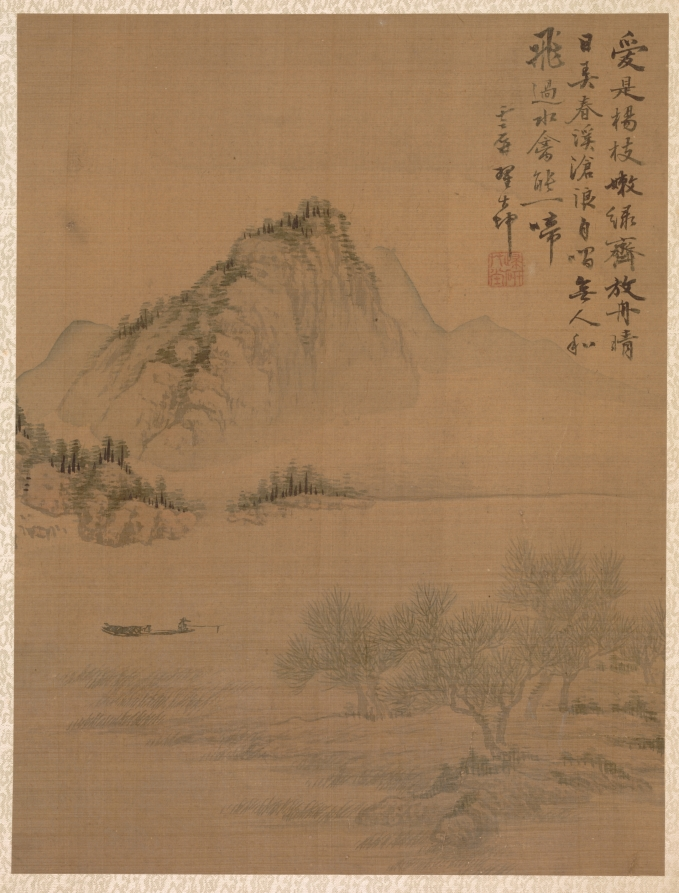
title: Landscape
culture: China, Qing dynasty (1644-1911)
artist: Zhai Dakun (Chinese, d. 1804)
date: 1775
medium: album leaf; ink and color on silk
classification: Painting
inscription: "Drifting in a Boat" I love these willow branches putting forth their delicate green leaves, Drifting in a boat, I pass the spring streams. Over Canglang I shout out, but no one responds, Only the water-birds flying by are able to give a single cry. Yunping Zhai Dakun Seal: 1) s/r "Quiyan caotang" (Thatched hall at Guiyan")